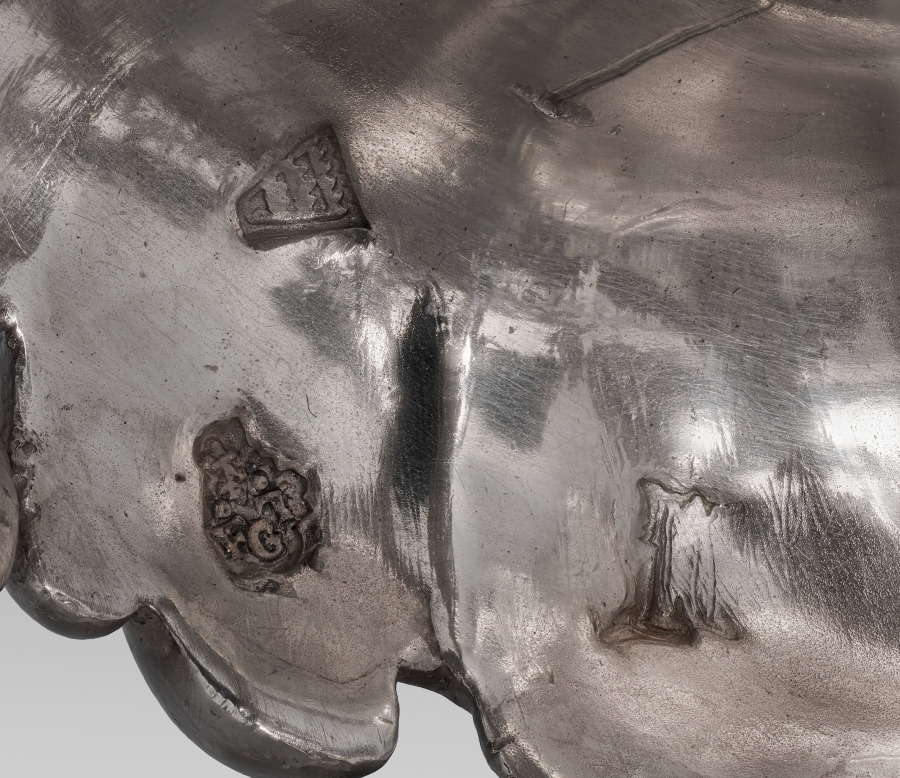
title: Candelabrum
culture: France, Paris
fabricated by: François Thomas Germain (French, 1726–1791)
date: 1757–58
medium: silver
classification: Silver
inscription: [Charge mark of Eloy Brichard , 1756−1762, beneath base]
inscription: [Warden's mark for Paris, 1757-1758, beneath base]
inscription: [Discharge mark for work intended for export, 1756−1775, on base]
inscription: [Hallmarks for Saint Petersburg, on base]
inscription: [Assayer mark of Ivan Frolov, on base]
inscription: [Russian standard of the French silver, on base]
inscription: [Maker’s mark of Francois-Thomas Germain, master silversmith on October 16, 1748, beneath drip pan one each of three bobeches]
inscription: [Charge mark Of Eloy Brichard, 1756−1762, beneath drip pan one each of three bobeches]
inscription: [Discharge mark for work intended for export, 1733 (?)−1775, beneath drip pan one each of three bobeches]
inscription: [Warden's mark for Paris, 1757−1758, beneath drip pan one each of three bobeches]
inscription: [Assayer mark of Ivan Frolov, beneath drip pan of one of three bobeches]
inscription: [Russian standard of French silver, beneath drip pan of one of three bobeches]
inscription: [Charge mark for large work of Eloy Brichard, 1756−1762, on candelabra bayonet attachment]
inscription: [Discharge mark for work intended for export, on candelabra bayonet attachment]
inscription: [Beneath base]: “Fait. Par. F. T. Germain. Sculp[teu]r. Orf[ev]re. Du Roy. Aux. Galleries. Du Louvre. A Paris. 1758”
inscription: [Beneath base]: "Du no.32"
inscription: [Beneath base]: "No 465"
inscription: [Engraved Russian Imperial coat-of-arms, beneath base]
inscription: [Modern inscription in a round paper label, beneath base]: “[?]8” [printed in black]: “3120” [written in pencil]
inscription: [Modern inscription in a rectangular paper label, beneath base]: “…IN/FRANCE” [printed in black]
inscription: [Modern inscription in a rectangular paper label, beneath base]: “46” [written in black ink]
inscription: [Engraved cipher composed with two “M”’s (?) surmounted by a royal crown, on base]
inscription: [Engraved, on base]: "No 465"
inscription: [Engraved, on base]: "du No 32"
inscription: [Engraved cipher composed with two “M”’s (?) surmounted by a royal crown, on one bobeche]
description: This candelabrum is part of a pair. Its design blurs the line between function and decoration. The arms twist and curve, appearing as flower stems while physically supporting the candles. Though this visual unity is typical of the Rococo style, the influence of the rising neoclassical style is evident in the allegorical scenes of light that decorate each candelabra’s stem.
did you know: These candelabra are part of a dinner service sent from Paris, France, to Saint Petersburg, Russia, in two separate shipments, the first of which contained 270 objects for 8 dozen place settings.